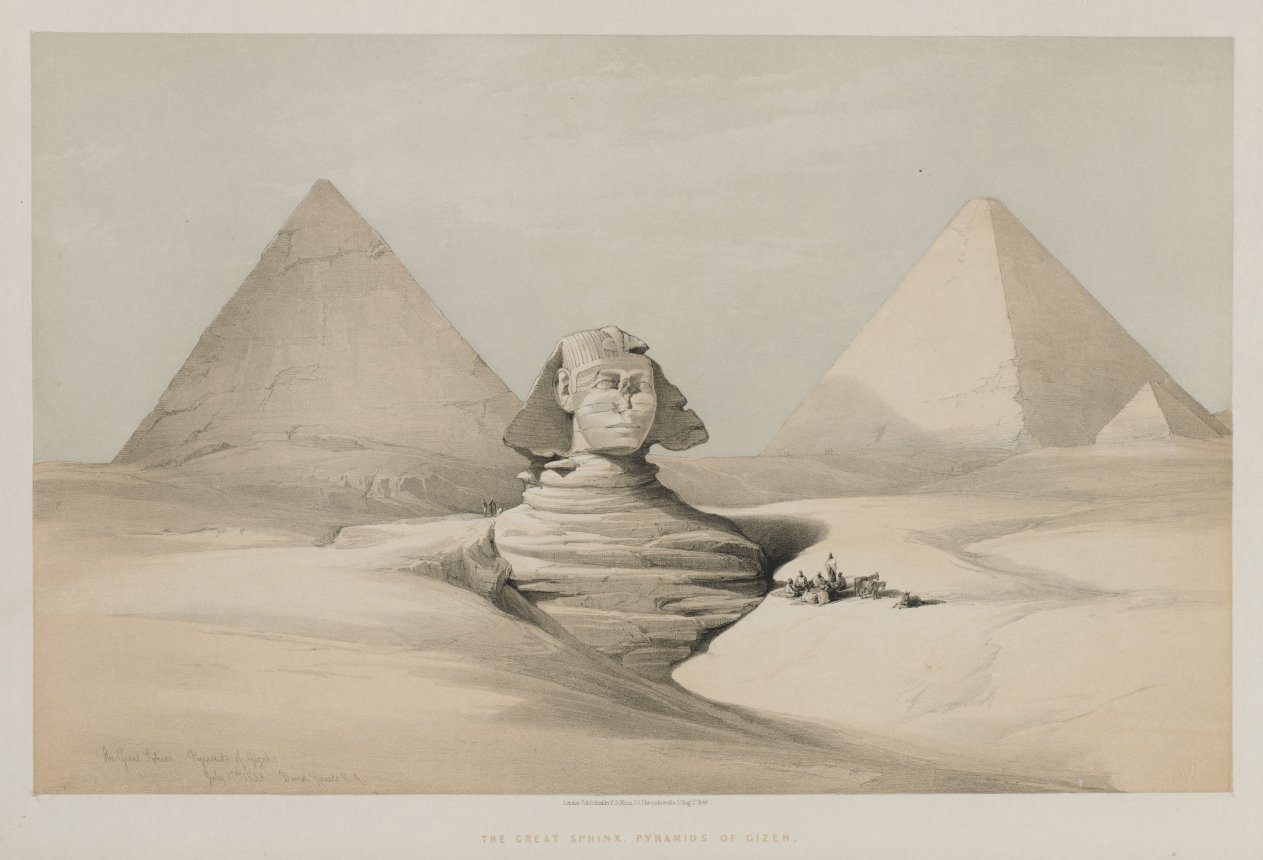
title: Egypt and Nubia, Volume I: The Great Sphinx, Pyramids of Gezeeh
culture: England, 19th century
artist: Louis Haghe (British, 1806–1885)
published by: F. G. Moon, 20 Threadneedle Street, London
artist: after David Roberts (Scottish, 1796–1864)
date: 1846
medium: color lithograph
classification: Print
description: The invention of photography was announced in 1839, but photographers did not arrive in Egypt until around 1850. Prior to that, general knowledge about the ancient sites came from writings and reproductions of the paintings and drawings of adventurous artists. Roberts, the first British artist to produce a series of Egyptian views, traveled through the Middle East in 1838–40. Back in England, he worked with Haghe to translate his drawings into color lithographs, which were published between 1842 and 1849 as an opulent series of portfolios. A stimulating mixture of documentation and romanticism that still moves today’s viewers, Roberts’s images appeared just before the availability of photographic depictions of the region and inspired the photographers who followed in his footsteps.